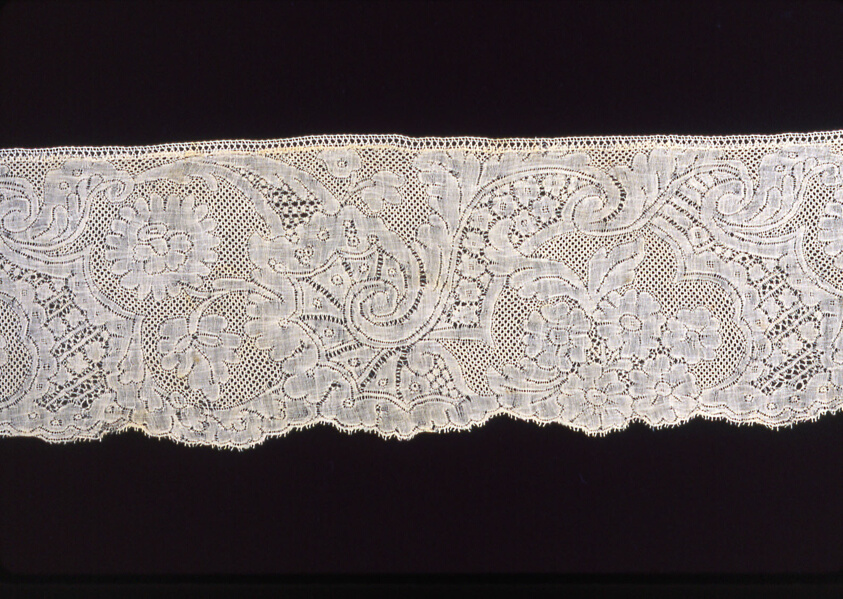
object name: Textile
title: Lace Borders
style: 18th Century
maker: France, Valenciennes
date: Mid-18th century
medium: Linen, bobbin straight lace of a type known as "Valenciennes" with a Five-Hole mesh ground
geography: Valenciennes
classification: lace - bobbin; textile; lace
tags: carnations, daisies, fans, floral motifs, flowers